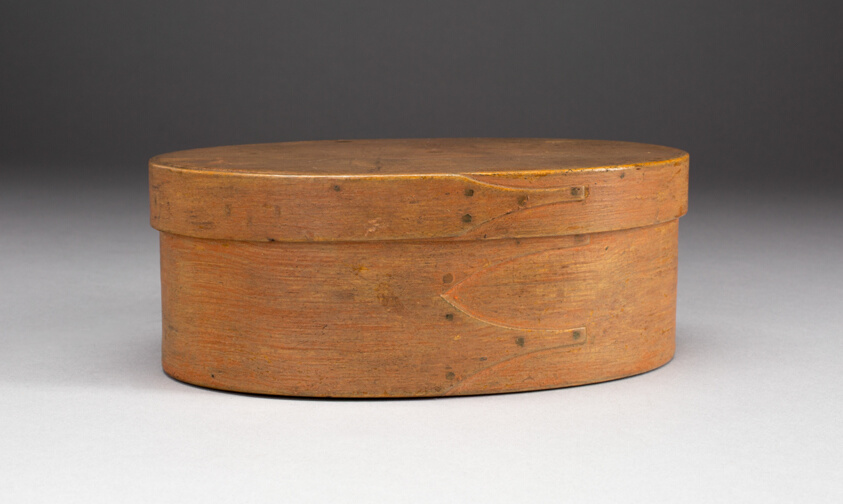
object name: Decorative Arts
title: Box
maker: Shaker Colony; American, 19th century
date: c. 1850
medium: White pine and maple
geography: United States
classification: case furniture; box; furniture; american decorative arts; american arts; decorative arts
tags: furniture